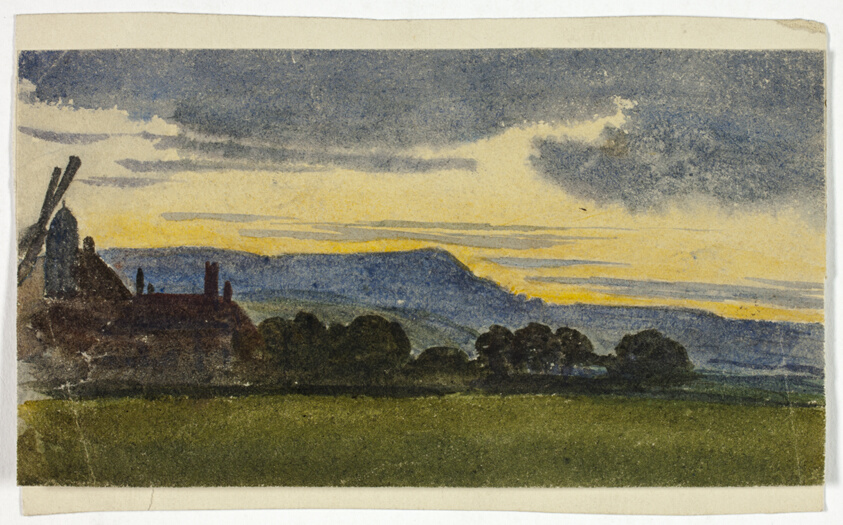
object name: Drawing and Watercolor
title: Hilly Landscape at Sunset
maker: Style of John Varley (English, 1778-1842)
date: c. 1830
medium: Watercolor on cream wove paper, tipped onto card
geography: England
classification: watercolor; drawings (visual works); prints and drawing